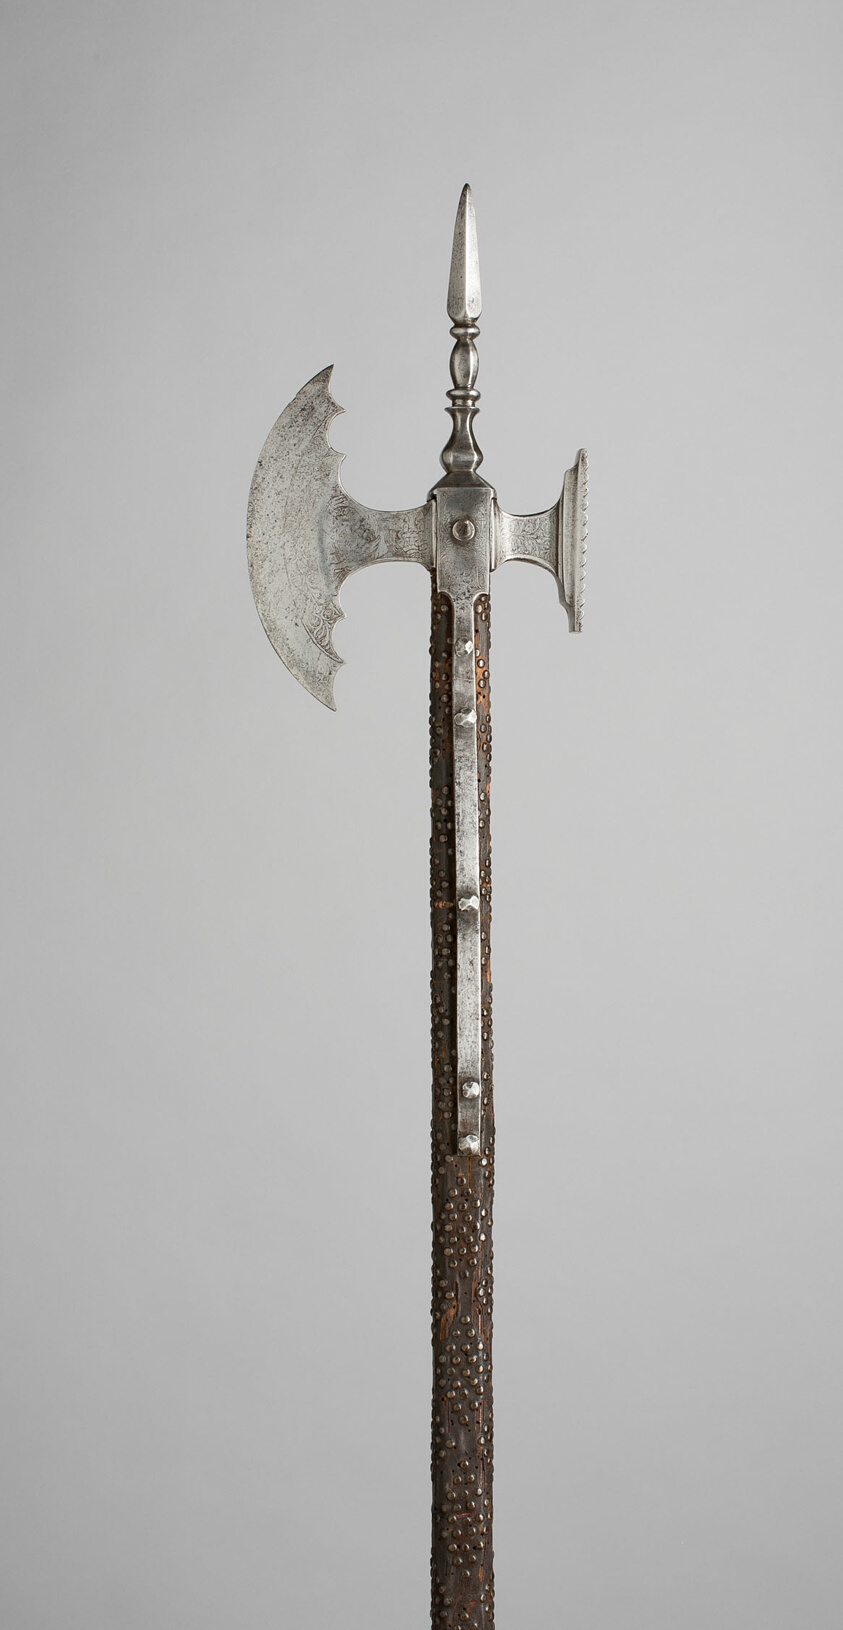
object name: Arms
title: Poleaxe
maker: Italian; Venice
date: 1500/10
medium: Steel, iron, brass, wood, and textile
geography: Venice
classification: edged weapon-staff; arms; arms and armor